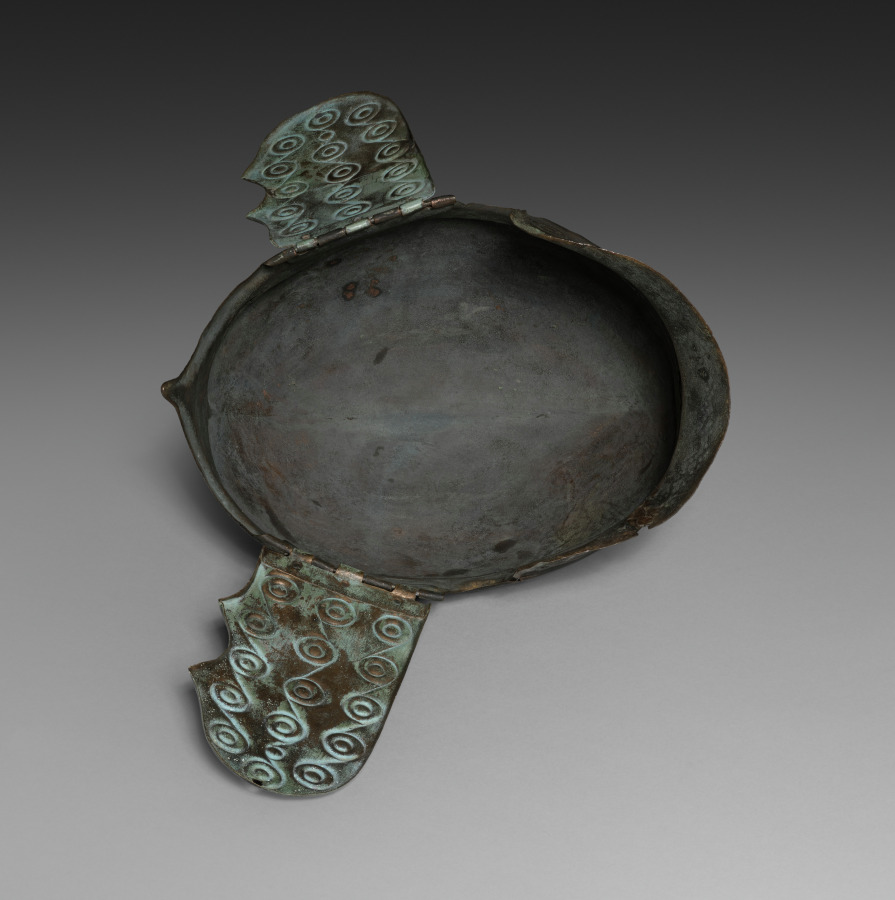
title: Chalcidian Helmet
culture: Greek (perhaps Black Sea area)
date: c. 350–200 BCE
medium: Tinned bronze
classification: Arms and Armor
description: Among ancient helmets, the Chalcidian type is varied, widespread, and comparatively unrestrictive, with relatively wide openings for the eyes and ears. This example, probably made in the Black Sea region or even further east, features a pointed noseguard, high carinated crown, molded brow ridge, and everted rear flange, plus large separately made hinged cheekpieces. The tinned bronze surface is almost silver in color, with extensive decoration including small incised linked scrolls and much larger embossed linked scrolls.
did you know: Although named for Chalcis, a city in Euboia, Chalcidean helmets were made across the Greek world.